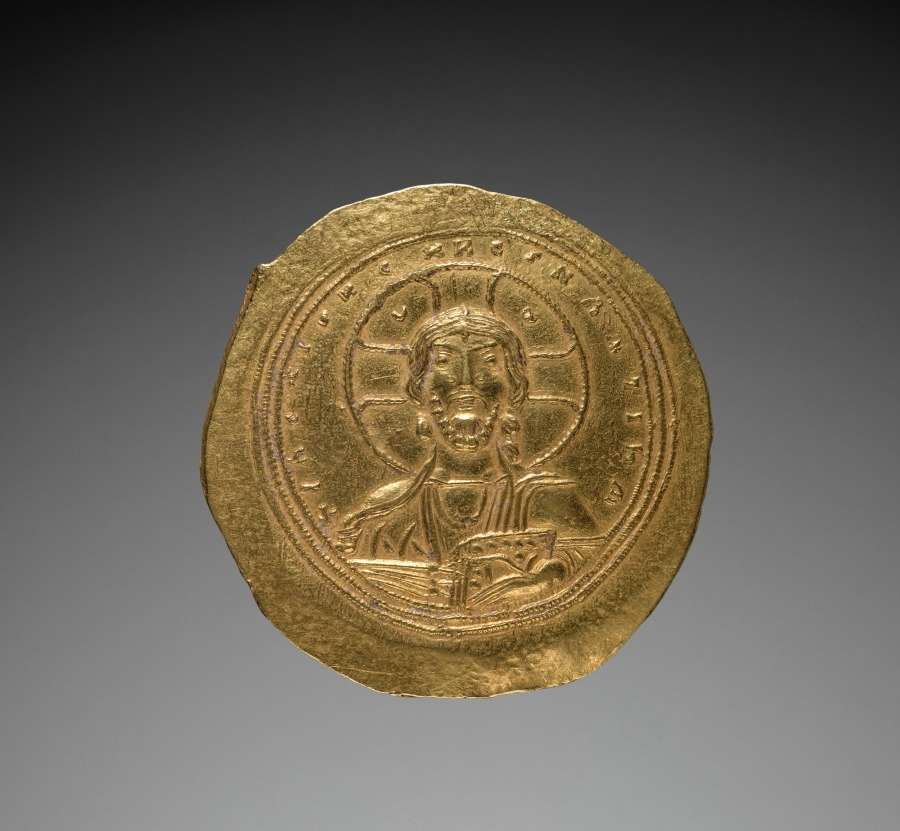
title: Nomisma with Constantine IX Monomachus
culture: Byzantium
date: 1042–1055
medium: gold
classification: Coins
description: Byzantine Gold Coins The vast number of surviving Byzantine coins attests to the level of trade across the empire. Controlled and supervised by the emperor, the producers of coins took care to represent his authority and reflect his stature. Talented artists were recruited to engrave the dies (molds) used for the striking of coins. Emperors increasingly came to include their heirs and co-emperors on their coinage, as well as other family members or even earlier rulers. Coins were recognized, then as now, as small, portable works of art. With their inscriptions and images, Byzantine coins provide valuable documentation of historical events and a record of the physical appearance of the emperors. The coins shown here include the solidus, the basic gold coin of 24 karats; the tremissis, a gold coin of one-third the weight and value of the solidus; and the nomisma, which in the 10th century replaced the solidus as the standard gold coin.